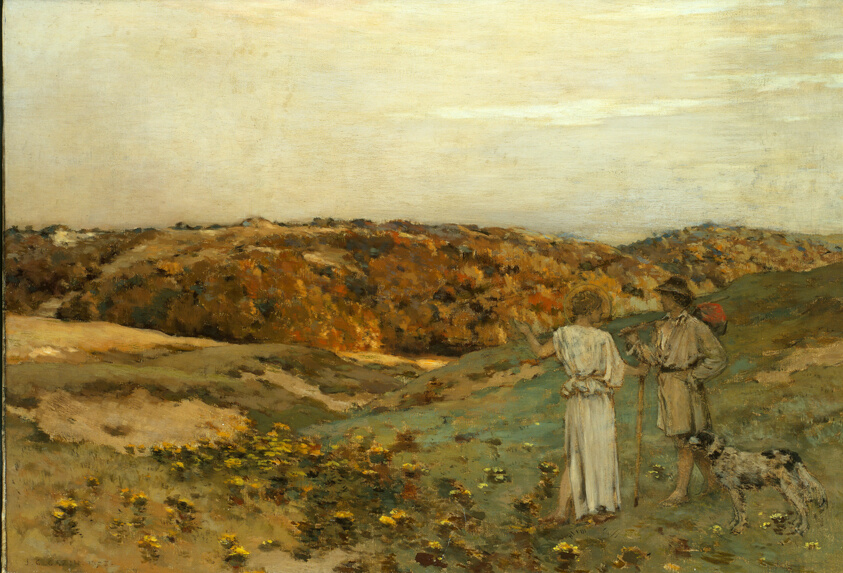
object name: Painting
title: Tobias and the Angel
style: 19th century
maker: Jean Charles Cazin (French, 1841–1901)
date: 1878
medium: Oil on canvas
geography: France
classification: oil on canvas; french; oil paintings (visual works); paint; painting; european painting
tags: angels, Christianity, Christian subjects, religious, religion, sky, travel, hills, figures, men, dog, landscape